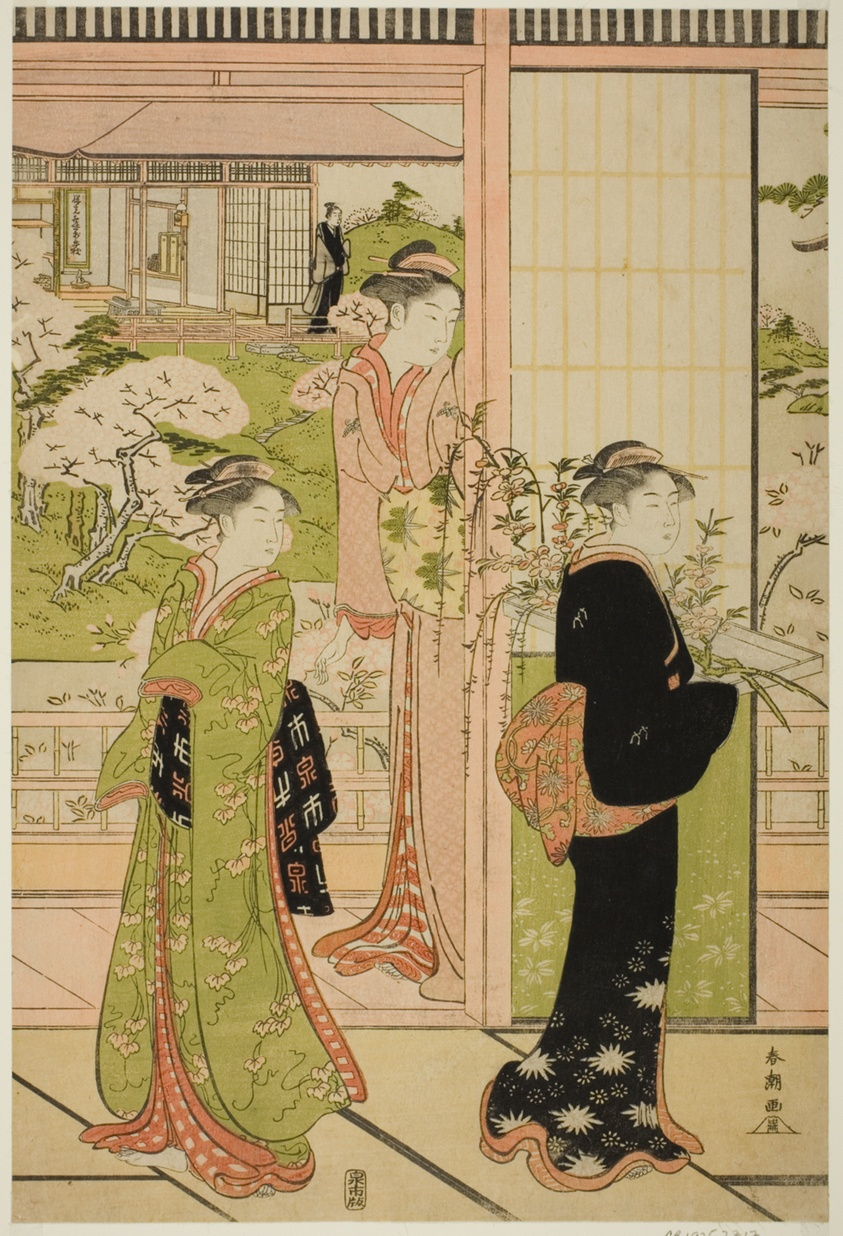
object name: Print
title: Scene from the Play "Imoseyama"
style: Japanese (culture or style)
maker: Katsukawa Shuncho; Japanese, active c. 1780-1801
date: late 1780s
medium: Color woodblock print; left sheet of oban triptych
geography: Japan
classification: woodblock print; print; asian art